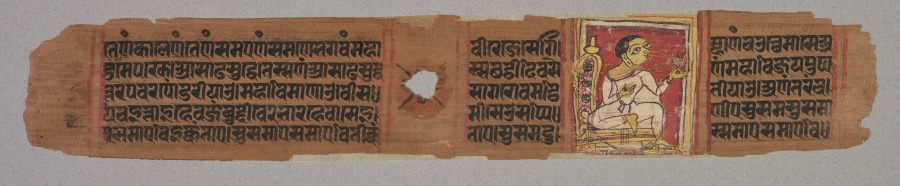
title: Monk Holding a Flower: Folio 2 (recto), from a Kalpa-sutra and Story of Kalakacharya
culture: Western India, Gujarat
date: 1287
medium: gum tempera and ink on palm leaf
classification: Painting